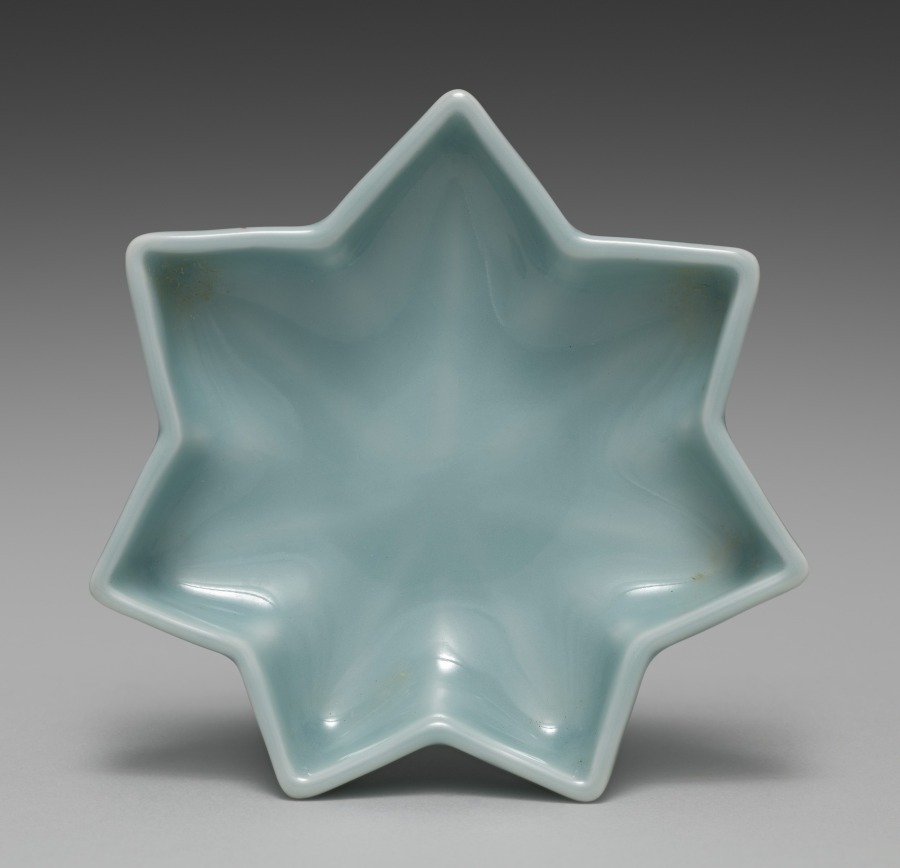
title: Saucer from Maple Leaf-Shaped Saucers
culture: Japan, Meiji period (1868–1912)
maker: Seifū Yohei III (Japanese, 1851–1914)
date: 1893–1914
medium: One of five dishes from a set of ten; porcelain with blue glaze and molded design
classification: Ceramic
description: These maple leaf–shaped saucers, like Yohei III's five shell saucers CMA 2022.188, have a long, horizontal box with a separate compartment for each piece. Now a set of five, these dishes were originally a set of ten, stored in two boxes of five each. From their housings, which accommodate differing numbers of objects, one can hypothesize that while some items created by the Seifu studio were intended to be acquired in larger sets, and thus were perhaps made to order, others, like these, may have been items to be purchased of the shelf in set quantities that allowed clients flexibility in scale. The box for these five saucers describes them as “heavenly blue[–glazed] porcelain” (tenseiji). The veins of the leaves are slightly raised in the clay so that the glaze pools around them and they stand out as white where the glaze thins. There are longer lines at the points of the leaves and shorter ones following the wall of each indentation so that the design has both a horizontal and a subtle vertical dimension.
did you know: These saucers shaped like maple leaves show Seifū Yohei III’s “heavenly blue glaze.”